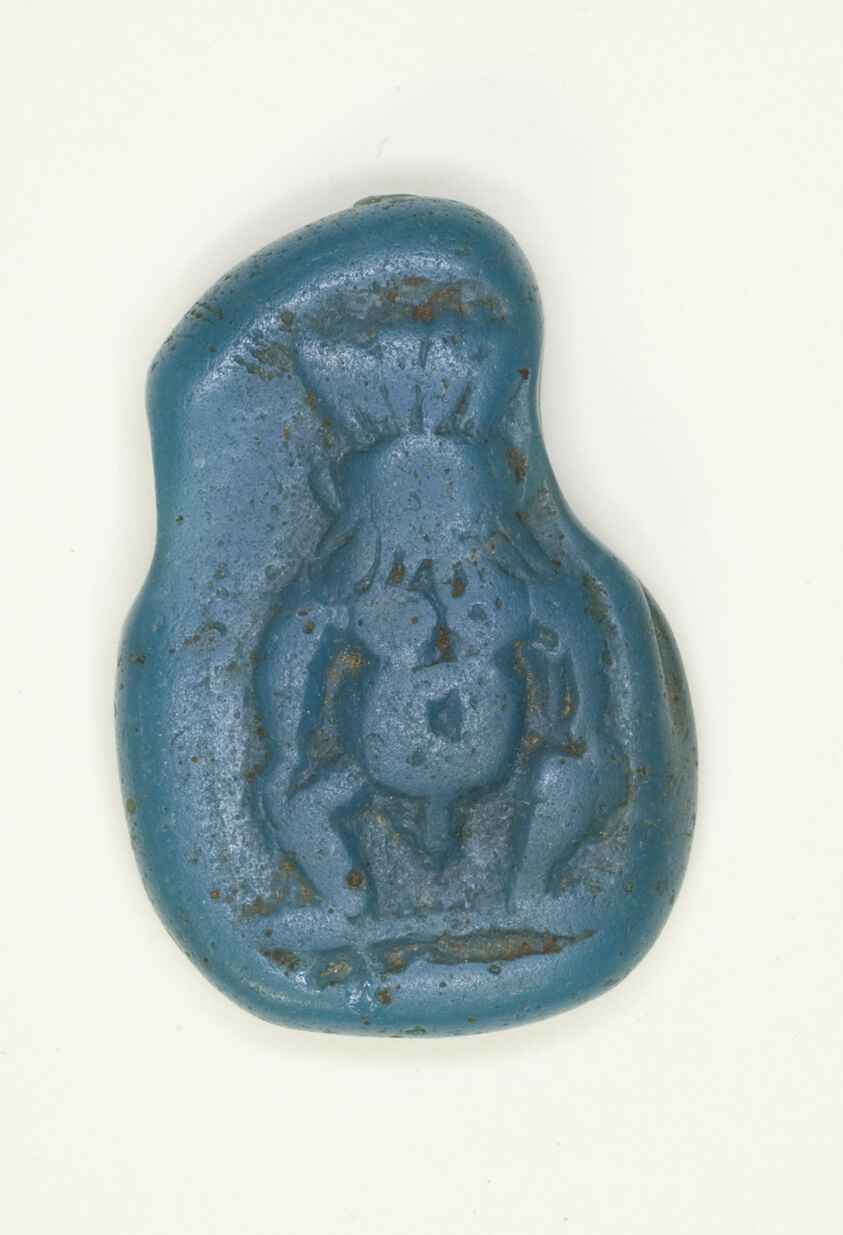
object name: Costume and Accessories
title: Amulet of the God Bes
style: egyptian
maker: Egyptian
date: Third Intermediate Period, Dynasties 21–25 (about 1069–656 BCE)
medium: Faience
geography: Egypt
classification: amulet; jewelry; glass; ancient art; costume; faïence (composite material)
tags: gods (deities)